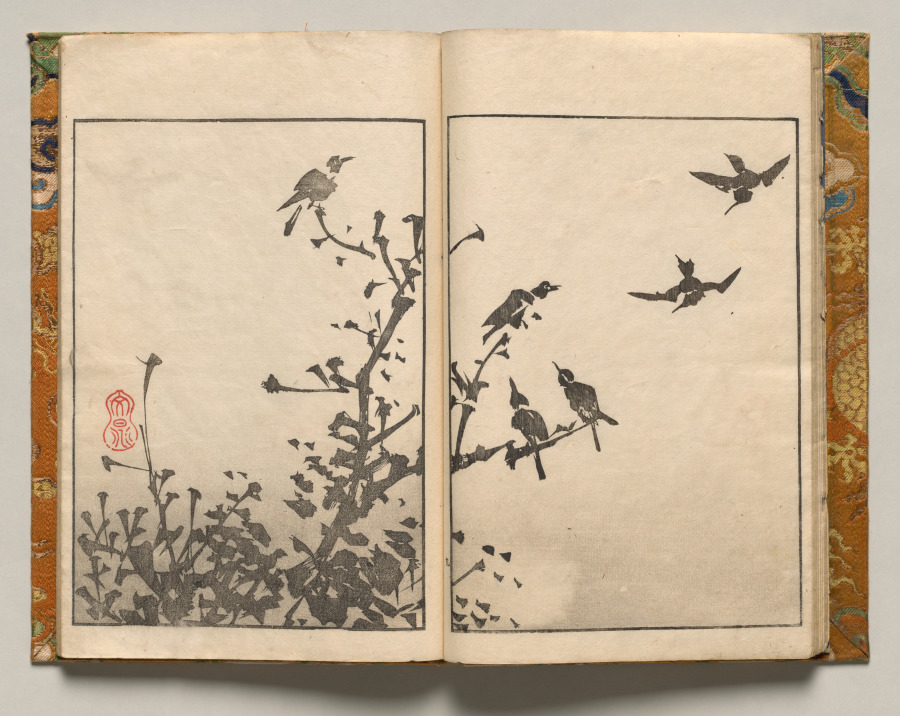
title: Birds in Branches, Design Nine from Shazanrō Picture Book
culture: Japan, Edo period (1615–1868)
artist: Tani Bunchō (Japanese, 1763–1841)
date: 1816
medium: woodblock-printed book; ink and color on paper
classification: Bound Volume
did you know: Shazanrō was one of Tani Bunchō's style names.